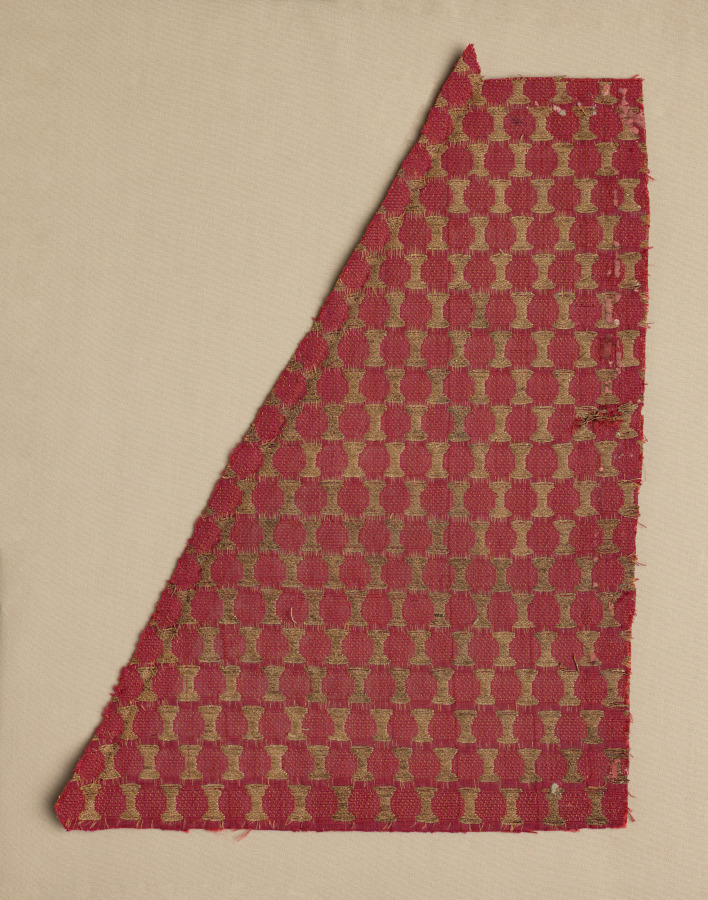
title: Velvet Fragment in Two Pieces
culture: Iran or Iraq, 14th century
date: 1300s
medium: velvet, lancé, silk and Cyprian gold around silk core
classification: Velvet